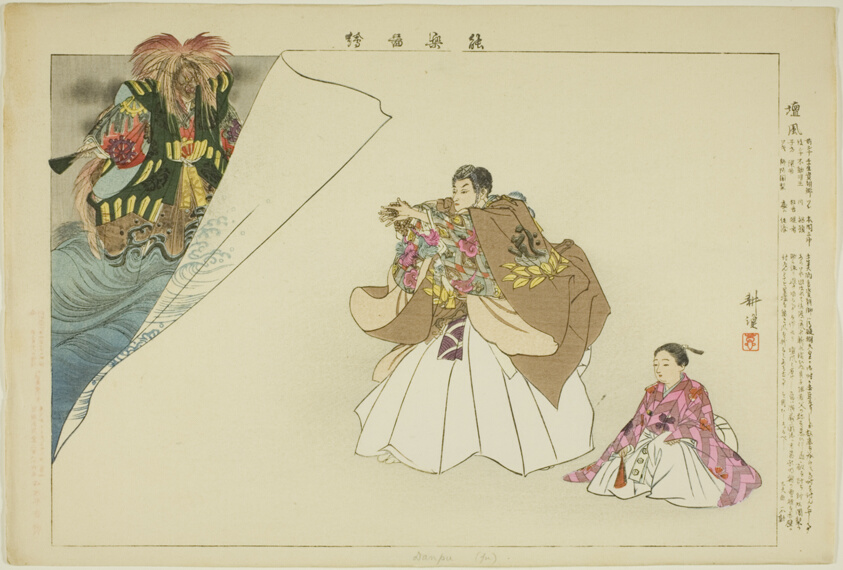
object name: Print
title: Dampu, from the series "Pictures of No Performances (Nogaku Zue)"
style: Japanese (culture or style)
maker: Tsukioka Kogyo; Japanese, 1869-1927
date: 1898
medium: Color woodblock print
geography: Japan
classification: woodblock print; print; asian art